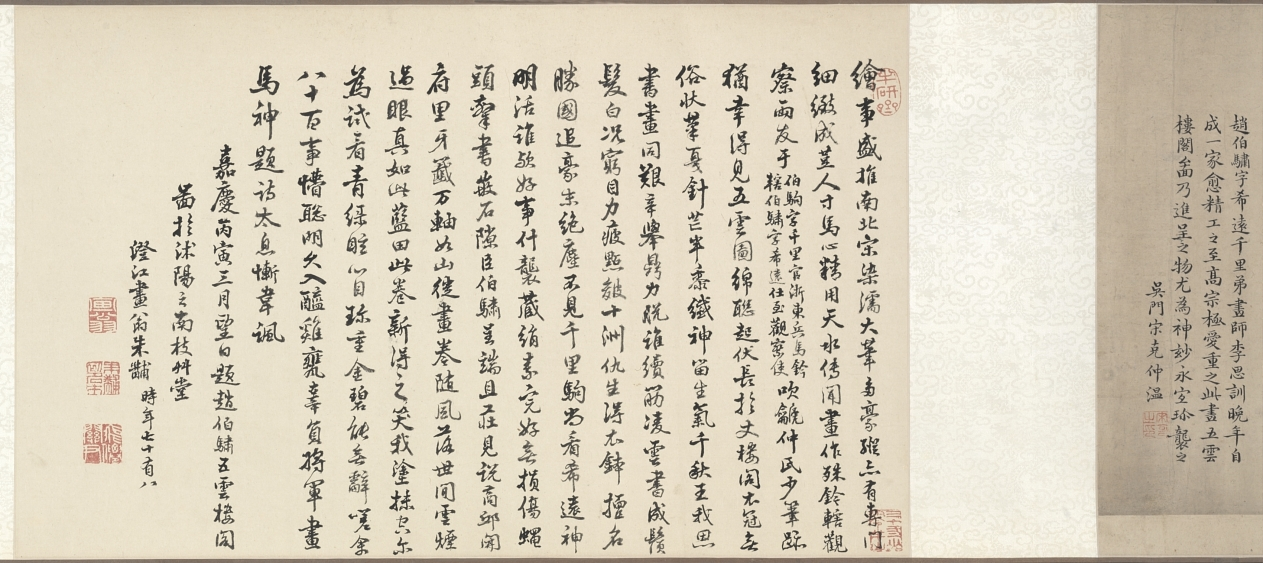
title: Landscape, The Palace of the Clouds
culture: China, Qing dynasty (1644-1911)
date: 1644–1911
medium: handscroll, ink on silk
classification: Painting